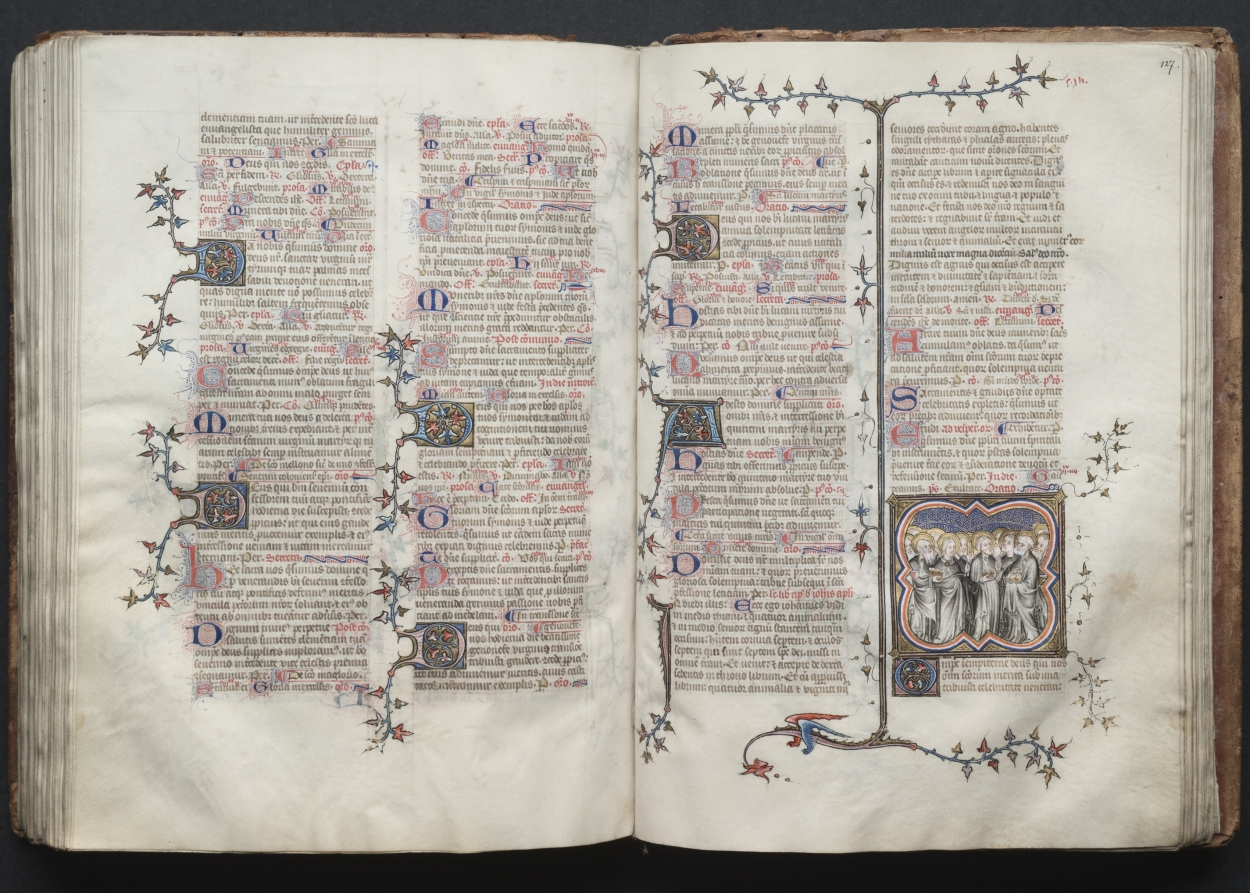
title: The Gotha Missal: Fol. 127r, All Saints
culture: France, Paris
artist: Master of the Boqueteaux (French)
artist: and Workshop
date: c. 1375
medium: ink, tempera, and gold on vellum; blind-tooled leather binding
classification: Bound Volume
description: The style and quality of this manuscript's decoration is typical of deluxe Parisian books made for aristocratic or royal patrons. Most of the book's decoration appears to be the work of the Master of the Boqueteaux, an artist active at the court of King Charles V (died 1380). His style was apparently shared by a number of book illuminators working in and around Paris. It is very possible that the Gotha Missal belonged to Charles V, but is not provable because the manuscript has no royal portraits and lacks a colophon. Given the book's magnificent decoration, however, it would seem that it was produced for a Valois prince, if not for the king himself. The manuscript receives its name from the German dukes of Gotha, its later owners.